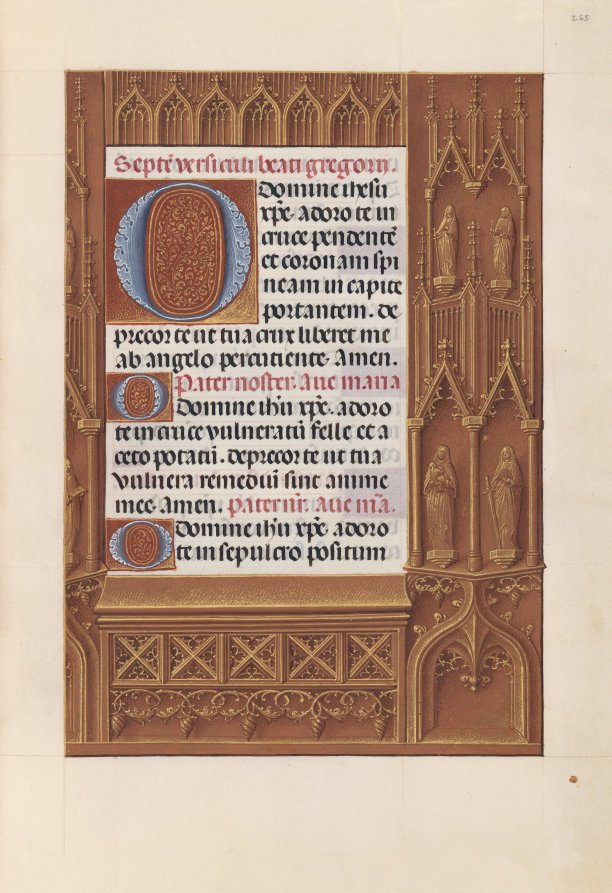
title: Hours of Queen Isabella the Catholic, Queen of Spain: Fol. 265r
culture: Flanders, Ghent and Bruges, late 15th century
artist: Master of the First Prayerbook of Maximillian (Flemish, c. 1444–1519)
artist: and Associates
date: c. 1500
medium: ink, tempera, and gold on vellum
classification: Bound Volume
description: This manuscript was illuminated by a circle of at least five highly organized manuscript painters active in the Flemish cities of Ghent and Bruges. The principal illuminator was Alexander Bening, who painted the majority of the book's miniatures. Manuscripts produced by this circle of artists are renowned for the decoration of their borders, which typically feature a rich variety of realistically-painted flowers, birds, and butterflies. This prayer book, called a book of hours, was intended not for a cleric, but for the private devotions of a lay person-in this case, Isabella the Catholic, Queen of Spain (1451-1504). Isabella's coat of arms embellishes the book's frontispiece. It is unlikely that the book was commissioned by the Queen herself; rather, she probably received it as a diplomatic gift from someone courting her patronage, perhaps Cardinal Francisco Jimenez de Cisneros. A Franciscan friar, Jimenez was dependent upon Isabella for his advancement, first to the post of Queen's confessor in 1492, and then to Archbishop of Toledo in 1495.